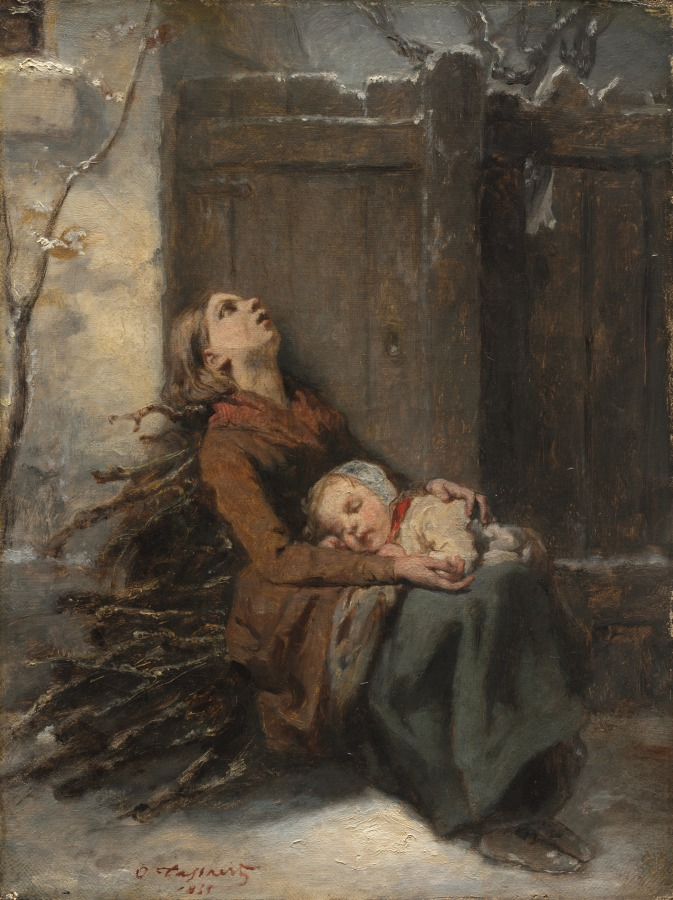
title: Destitute Dead Mother holding her sleeping Child in Winter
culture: France, 19th century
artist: Octave Tassaert (French, 1800–1874)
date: c. 1850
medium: oil on canvas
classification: Painting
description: One of France's leading artists of the mid-19th century, Octave Tassaert was known for his paintings of downtrodden workers, destitute mothers, suicides, and abandoned children. Viewers responded positively to his focus on issues of social injustice, as seen in this painting of a poor mother resting outdoors in the show with her baby. She is leaning against a pile of sticks, a common activity among the poor of gathering and selling small pieces for wood for burning in fireplaces or stoves.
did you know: Greatly admired by writers and social activists, Octave Tassaert provided illustrations for books by such celebrated authors as Alexandre Dumas père and Victor Hugo.